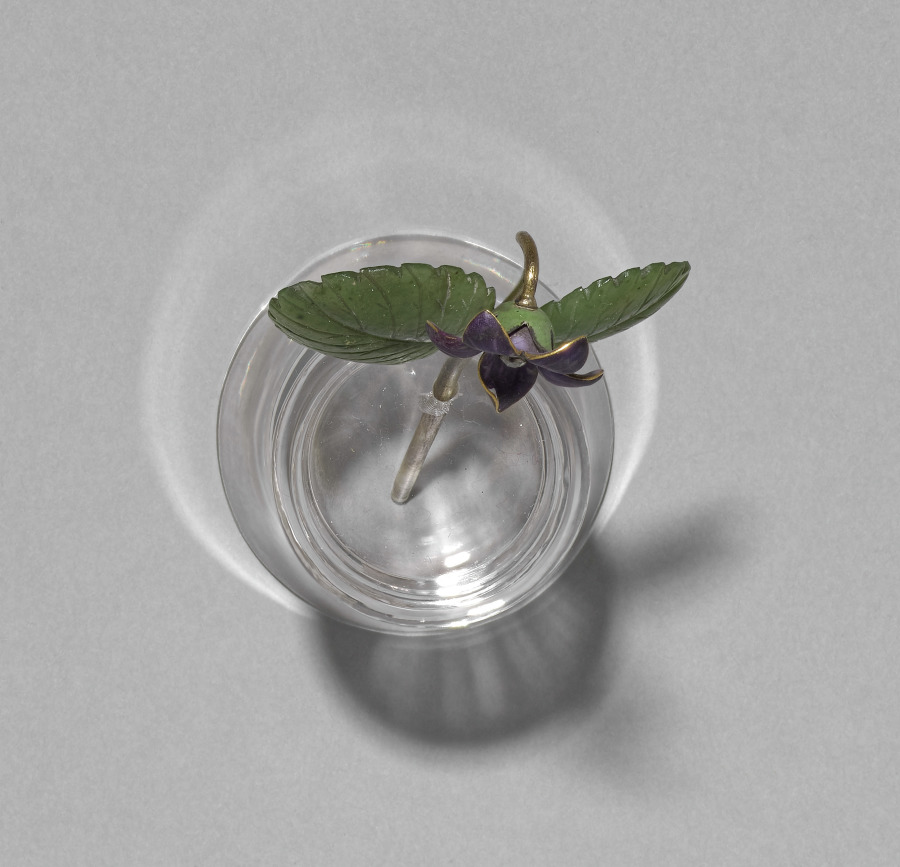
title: Flower Study of a Violet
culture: Russia, St. Petersburg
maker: House of Fabergé (Russian, 1842–1918)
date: c. 1885–1915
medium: enamel, silver gilt, jade, diamond, rock crystal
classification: Miscellaneous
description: This flower study depicts a single stem of violet. Fabergé’s inspiration for his flower studies is said to have come from the floral brooches of precious stones that were made in the 1700s for Catherine the Great as well as from the Japanese art of flower arranging, known as ikebana. Small and delicate, Fabergé’s flower studies were given as intimate gifts to friends by the tsarina and others in the court. She also liked to take them around to wherever the imperial family was residing as a reminder of spring during the harsh Russian winters.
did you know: The stems of Fabergé’s flower studies are set into little basins carved from rock crystal to resemble pots of water.